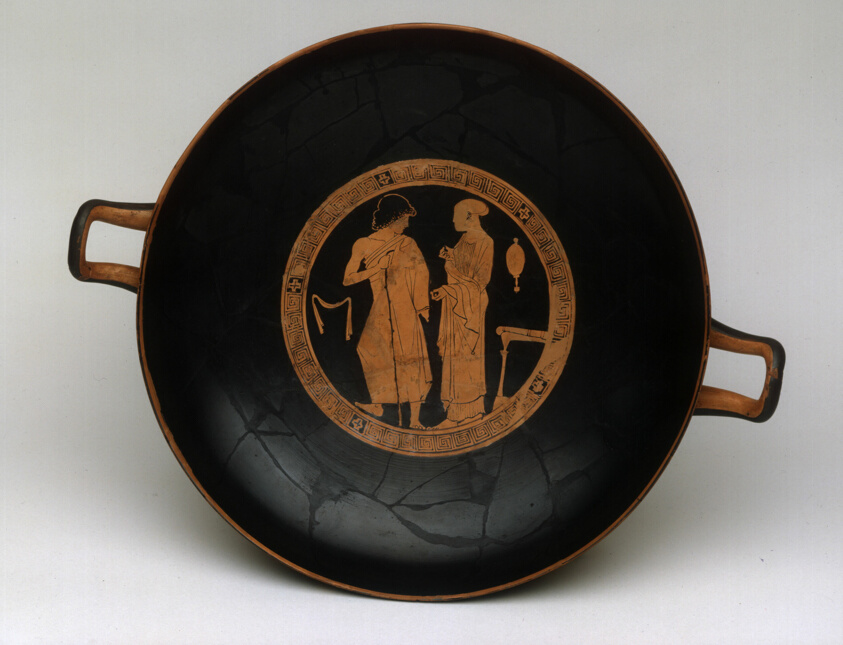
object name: Vessel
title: Kylix (Drinking Cup)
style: Classical, greek, red-figure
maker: Attributed to the Penthesilea Painter; Greek; Athens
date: about 460 BCE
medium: terracotta, red-figure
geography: Ancient Greece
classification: drinking vessel; ceramics; vessel; ancient art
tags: drinking, woman, youth, dining